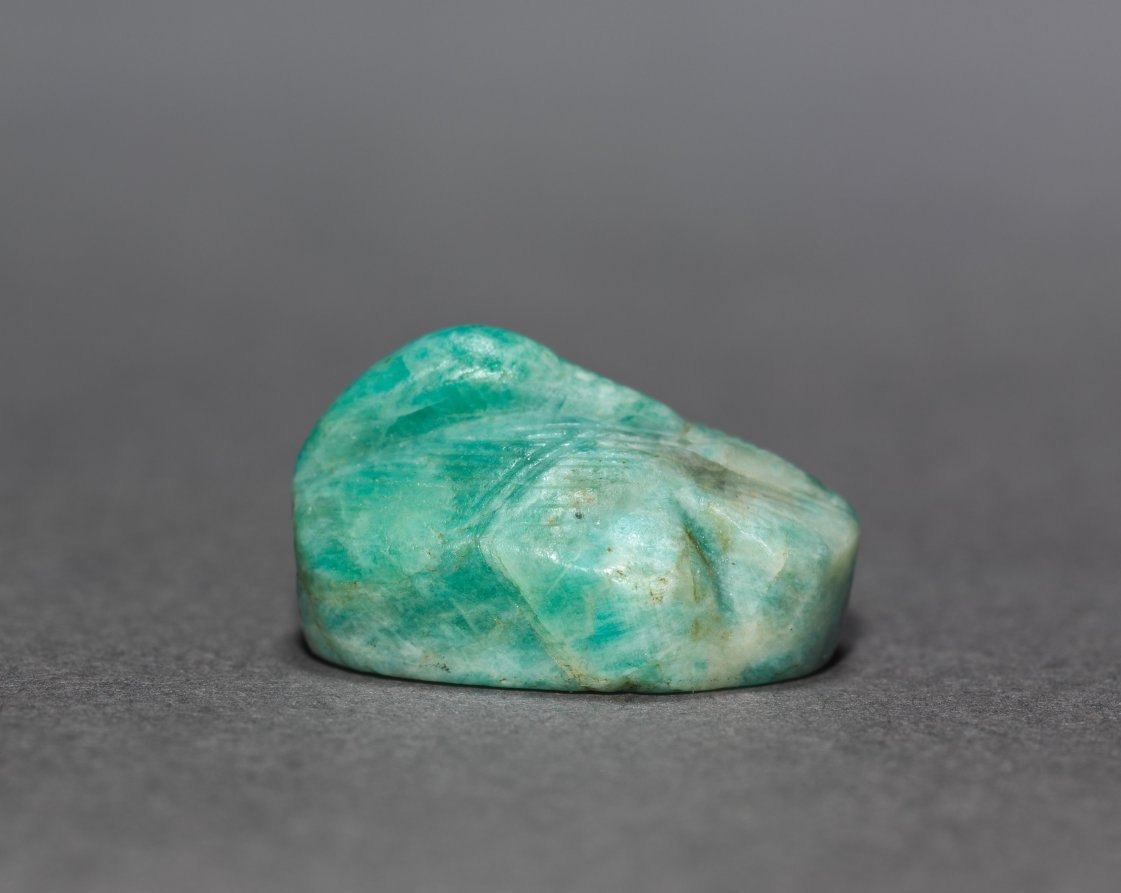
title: Sleeping Duck Amulet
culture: Egypt, New Kingdom (1540–1069 BCE), Dynasty 18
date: 1540–1295 BCE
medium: feldspar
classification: Amulets